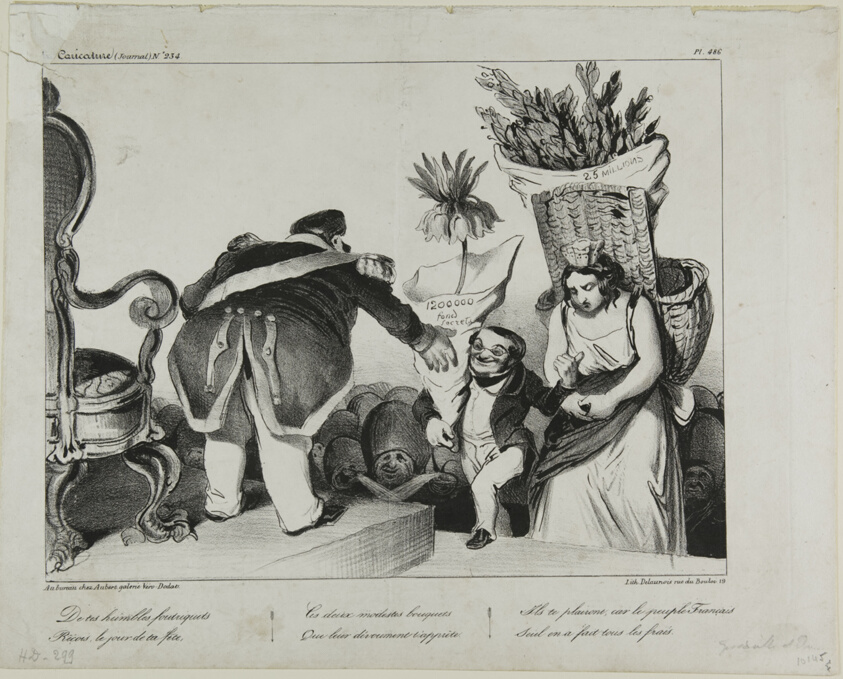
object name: Print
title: "From your obedient subjects receive on your day of honor these two modest bunches of flowers. They will make you rejoice, since the people of France alone has taken over the costs," plate 486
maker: Honoré Victorin Daumier; French, 1808-1879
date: 1835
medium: Lithograph in black on white wove paper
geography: France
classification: lithograph; print; prints and drawing